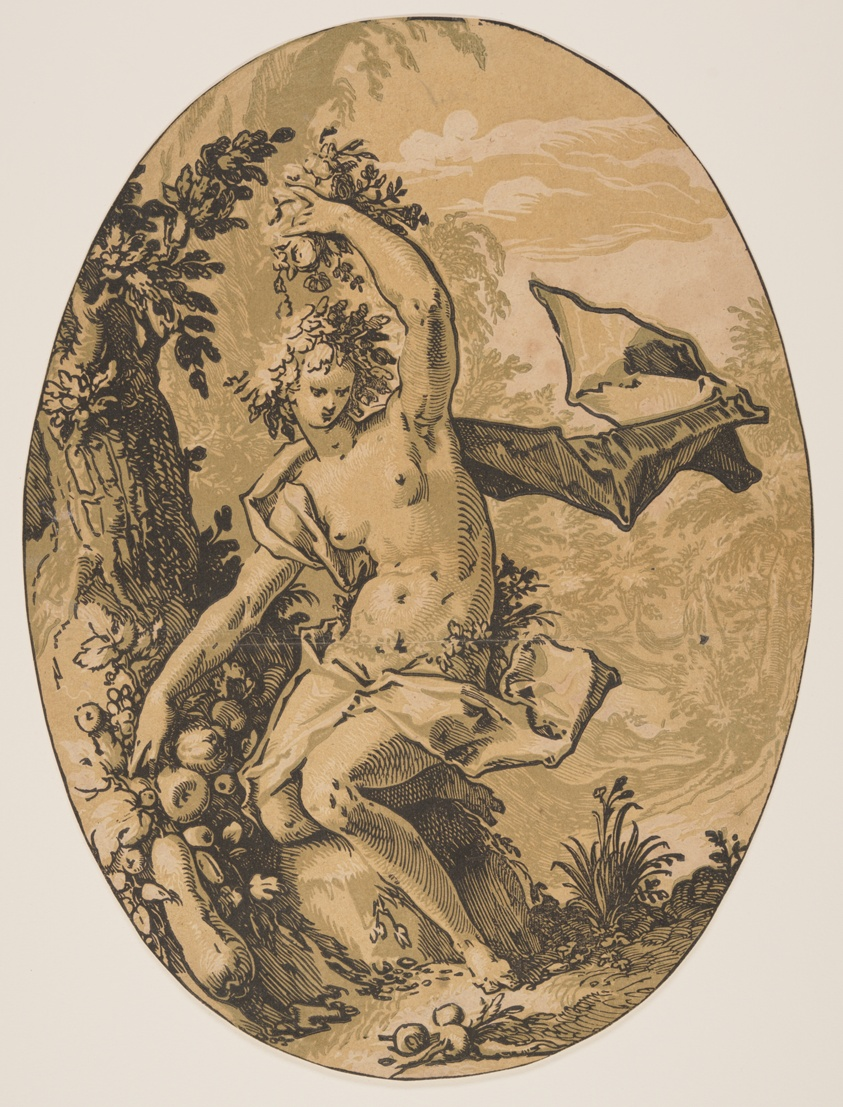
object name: Print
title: Proserpine, from The Deities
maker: Hendrick Goltzius (Dutch, 1558–1617)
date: 1588/90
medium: Chiaroscuro woodcut from three blocks in tan and green on ivory laid paper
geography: Netherlands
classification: print; paper; prints and drawing; woodcut